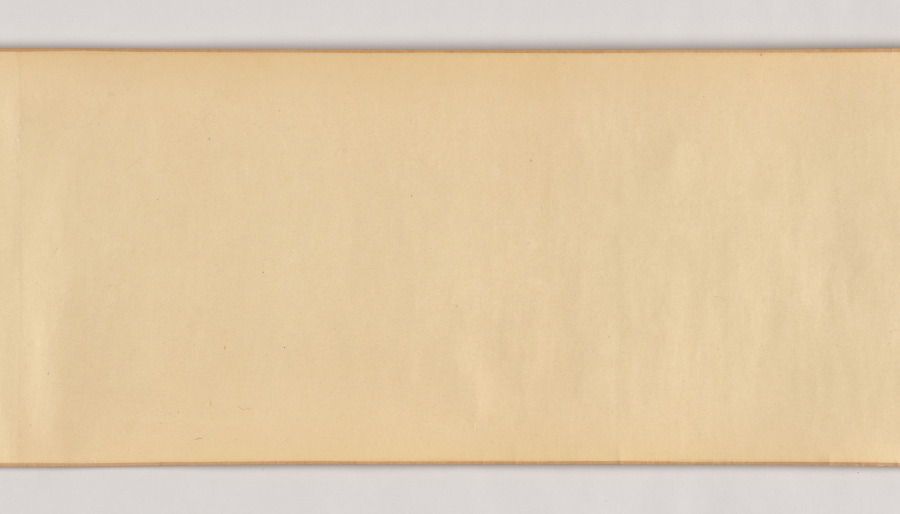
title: Three Horses and Four Grooms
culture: China, Yuan dynasty (1271-1368)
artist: Ren Renfa (Chinese, 1254–1328)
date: c. 1320s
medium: handscroll, ink and color on silk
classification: Painting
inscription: 月山道人. [印] 任氏子明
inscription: 1 colophon and 16 additional seals: 1 poem, 1 colophon dated 1552 or 1612, and 3 seals of Wang Yiying 王一瀛 (1500s); 2 seals of Liang Qingbiao 梁清標 (1620-1691); 6 seals of the Qianlong 乾隆 Emperor (r. 1736-95); 3 seals of the Jiaqing 嘉慶 Emperor (r. 1796-1821); 1 seal of the Xuantong 宣統 Emperor (r. 1908-12); 1 seal of Yu Xiezhong 余協中 (1900s).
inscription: Poem and colophon by Wang Yiying 王一瀛 (1500s): As for painters of horses in the previous dynasty, Surely the name of Yueshan [Ren Renfa] must come first. Under his brush and on his silk, They seem to have just galloped out from the imperial stud. Now as the world overflows with inferiority, Who, from the stable, can recognize a dragon-horse amidst mediocrity. Ren Yueshan [Ren Renfa] of the Yuan Dynasty was best in horse paintings. The three fine steeds he painted in this scroll are so dashing, so vigorous in spirit that they have indeed grasped some of the "brush-idea" of Han Gan. Not long ago this painting came into the possession of Mr. Gui Shanquan, who asked for my inscription. And I, while reading the old manuscripts of Hengshan [Wen Zhengming, 1470-1559], by accident, came cross the poem quoted above. As the ancients said "in painting horses, Master Han was [inspired by and produced] real horses; in composing poems, Master Su [Su Dongpo, the leading Song poet] wrote as if a painting were before him." These are truly what should be considered the two excellences; indeed, they are to be treasured. In the sixth month of the renzi year [either 1552 or 1612]. Jian feng shan ren [The Mountain Dweller of the Sword Peak], Wang Yiying, written in the Qu si ting Pavilion at Chiyang.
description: Ren Renfa's horse images are elegant in appearance and vigorous in spirit. His work attracted not only Chinese scholars but also the Mongols at the imperial court. Inspired by the contemporary scholarly interest in restoring a sense of antiquity in art—an artistic direction led by Zhao Mengfu that exerted a great impact in the Yuan art scene—Ren Renfa, like Zhao Mengfu, modeled his depictions of horses after the Song master Li Gonglin. Another key style component that Ren introduced to this genre was a revival of the Tang classical tradition. The refined color treatment of the horses as seen here was derived from the Tang master Han Gan.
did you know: Only the elegant first horse with a white blaze is accompanied by two grooms, as if its lightning speed required extra supervision.